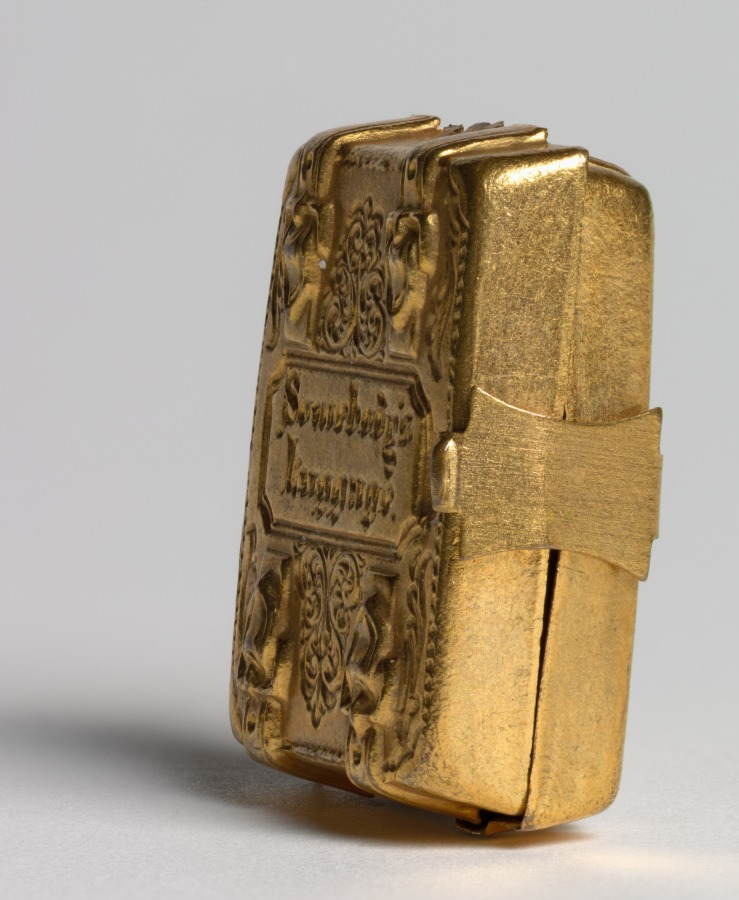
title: Somebody's Luggage (Miniature Wedding Album of Tom Thumb and Lavinia Warren)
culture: America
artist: Mathew Brady (American, 1823–1896)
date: c. 1863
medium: brass photographic locket with 12 miniature albumen prints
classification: Jewelry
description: This deluxe commercial souvenir commemorates the marriage of “General” Tom Thumb (Charles Sherwood Stratton) and Lavinia Warren, performers at P. T. Barnum’s American Museum. Thumb was such a celebrity that the wedding pushed the Civil War off newspapers’ front pages for days. Cartes-de-visite of the wedding sold in the thousands; Brady even licensed the image to lithographers and other photographers. In one image, Lavinia holds a baby who was borrowed for the photo shoot to suggest her domestic skills. The locket is shaped like a miniature suitcase bearing the words “Somebody’s Luggage,” the title of an 1862 story by Charles Dickens.